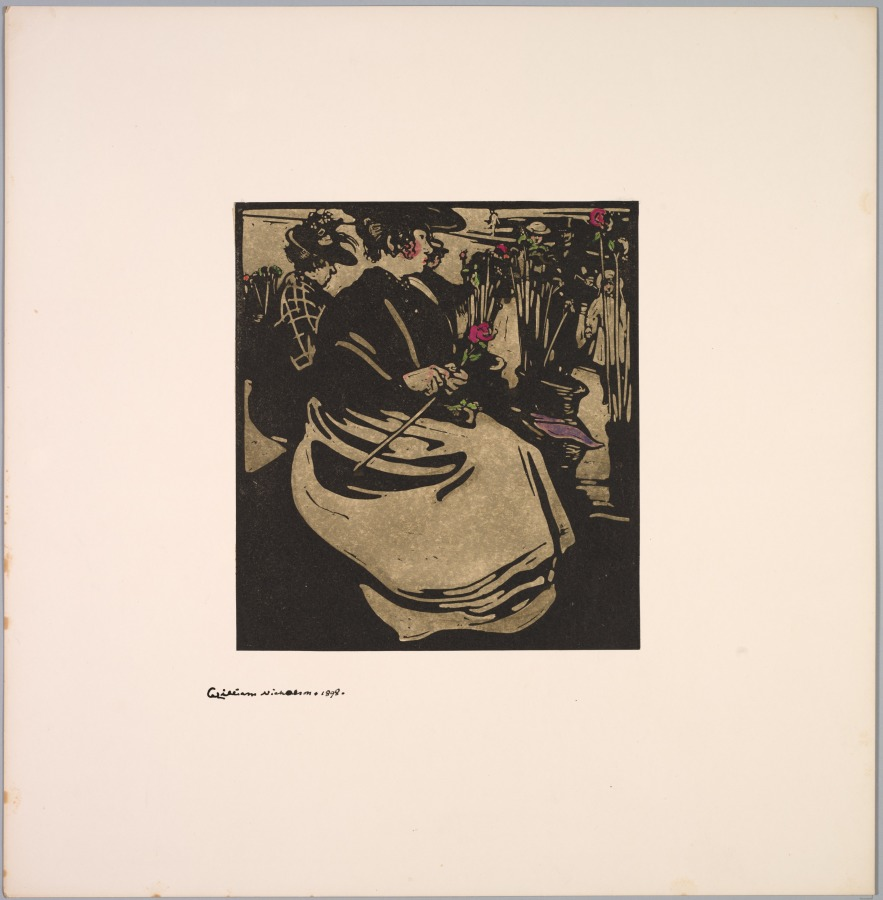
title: London Types: Flower Girl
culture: England, 19th century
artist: William Nicholson (British, 1872–1949)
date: 1898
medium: woodcut hand-colored with watercolor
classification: Print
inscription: lower left margin, in black ink: William Nicholson - 1898 -